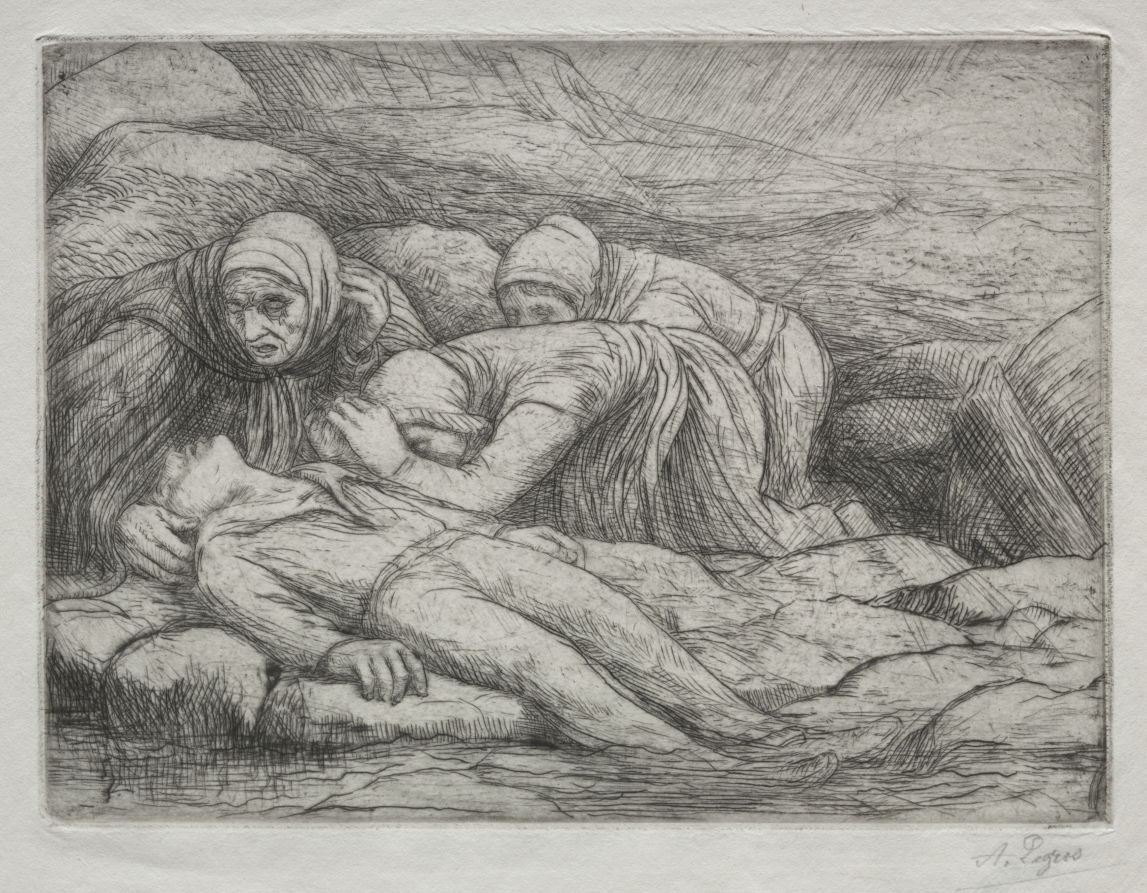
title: Triomphe de la Mort: La Mort chez une famille de Marins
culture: France, 19th-20th century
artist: Alphonse Legros (French, 1837–1911)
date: c. 1857–1911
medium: etching and drypoint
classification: Print